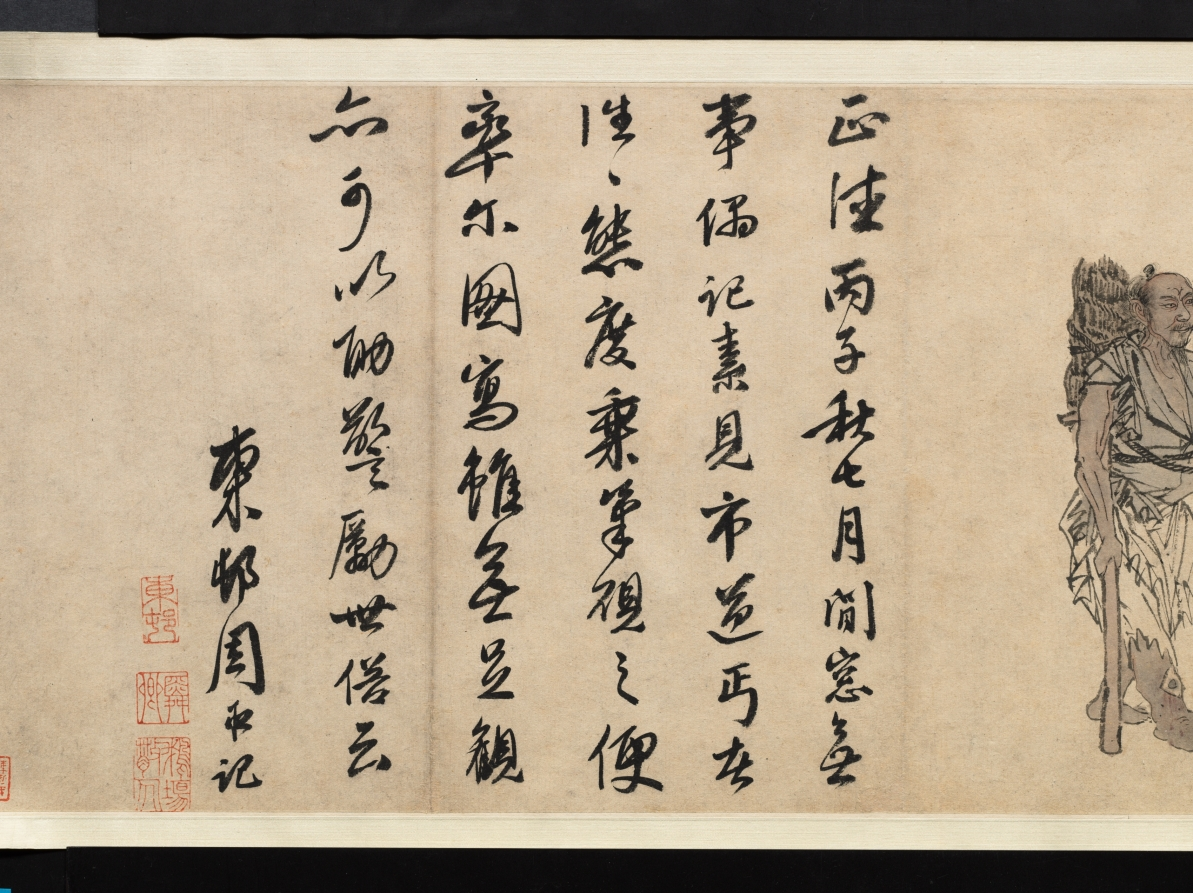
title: Beggars and Street Characters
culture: China, Ming dynasty (1368–1644)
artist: Zhou Chen (Chinese, c. 1450–c. 1536)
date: 1516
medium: Handscroll; ink and light color on paper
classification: Painting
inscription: 題: 周臣流氓圖. 古堇趙鶴琴 [印] 老鶴臨池; 鵝池軒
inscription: 正德丙子秋七月，閒窗無事 ，偶記素見市道丐者種種態度。乘筆硯之便，率爾圖寫。雖無足觀，亦可以助警勵世俗云。 東邨周臣記 [印]東邨; 舜卿; 鵝場散人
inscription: 吳中東邨周君，善丹青，尤長於人物。此圖其所見盛市丐者之狀種種，各盡其態，觀者絕倒。嗟乎，今之晝夜乞哀以求富貴者，安得起周君而貌之耶。臥雲徵君出示，余漫題其後。 甲子歲十月吳門黃姬水 [印] 士雅山人; 另一印不詳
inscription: 是冊凡數種。其飢寒流離疲癃殘疾之狀，種種之異。觀此而不惻然心傷者，非仁人也。計正德丙子逆瑾之流毒已數年。而[江]彬 [錢] 寧輩肆虐方熾。意分符剖竹諸君，亦鮮有能撫字其民者。然則舜卿此作，殆與鄭君 流民圖同意。其有補於治道者不淺，要不可以墨戲忽之也。 長洲張風翼題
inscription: 東村此筆，蓋圖寫飢寒乞丐之態，以警世俗耳。而質山 [黃姬水]欲其寫昏夜乞哀，而靈墟[張鳳翼]則擬之於安上門圖。二君之見，其各有所指哉。昔唐六如每見周筆，輒稱曰：周先生！蓋深服其神妙之不可及。若此冊者，信非他人可能而有符於六如之心伏矣。豈易得耶。若黃、張之指，則又論於畫之外，不在於形似筆墨之旨也。 萬歷丁丑十二月三日 茂苑文嘉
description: Zhou Chen from Suzhou provides rare depictions of impoverished people that once filled the city’s markets and streets. Despite Suzhou’s prosperity, its rapid growth polarized society, including the wealthy and those who had deserted their farmlands, who were without homes, unemployed, or sick. Amid these are figures who inspire fear rather than empathy. The painting may thus be informed by local practices at the end of the lunar year, in which street beggars, in exchange for food or money, would dress up like ghosts and demons to drive out evil forces.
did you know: Although Zhou Chen's original composition was an album of 24 figures, today it is mounted as two handscrolls, one in the Cleveland collection and one in the Honolulu Museum of Art.